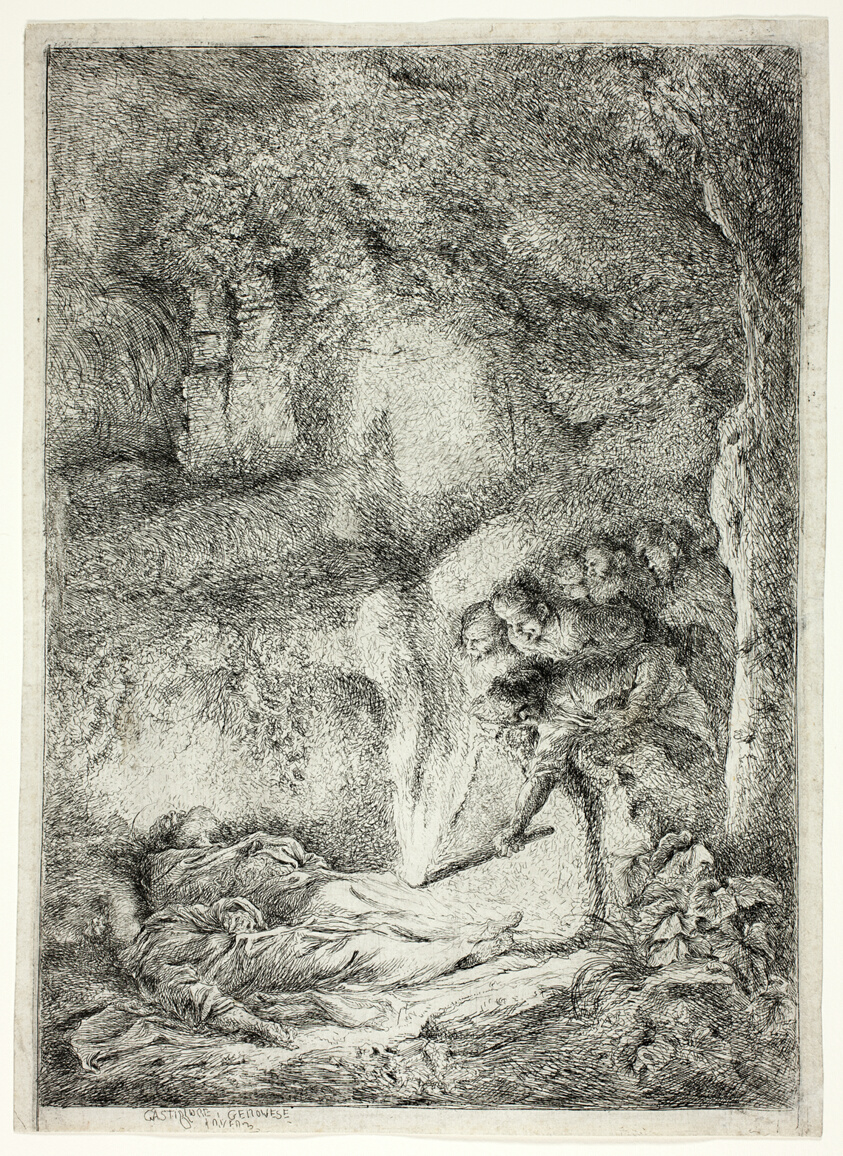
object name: Print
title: The Bodies of Saints Peter and Paul Hidden in the Catacombs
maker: Giovanni Benedetto Castiglione (Italian, 1609-1664)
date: 1647/51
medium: Etching and drypoint in black on ivory laid paper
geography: Italy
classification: etching; paper; print; prints and drawing